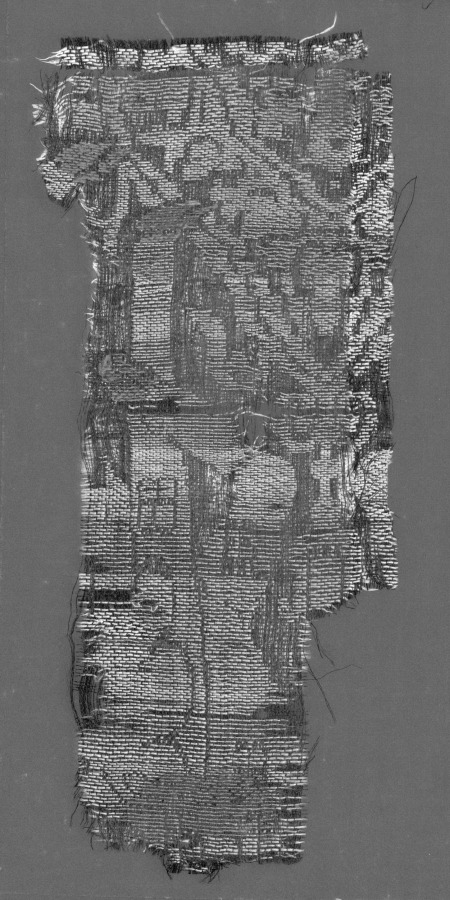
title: Three Fragments of Italian Gothic Silk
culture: Italy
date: 1300s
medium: lampas weave, brocaded; silk and gold thread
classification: Textile